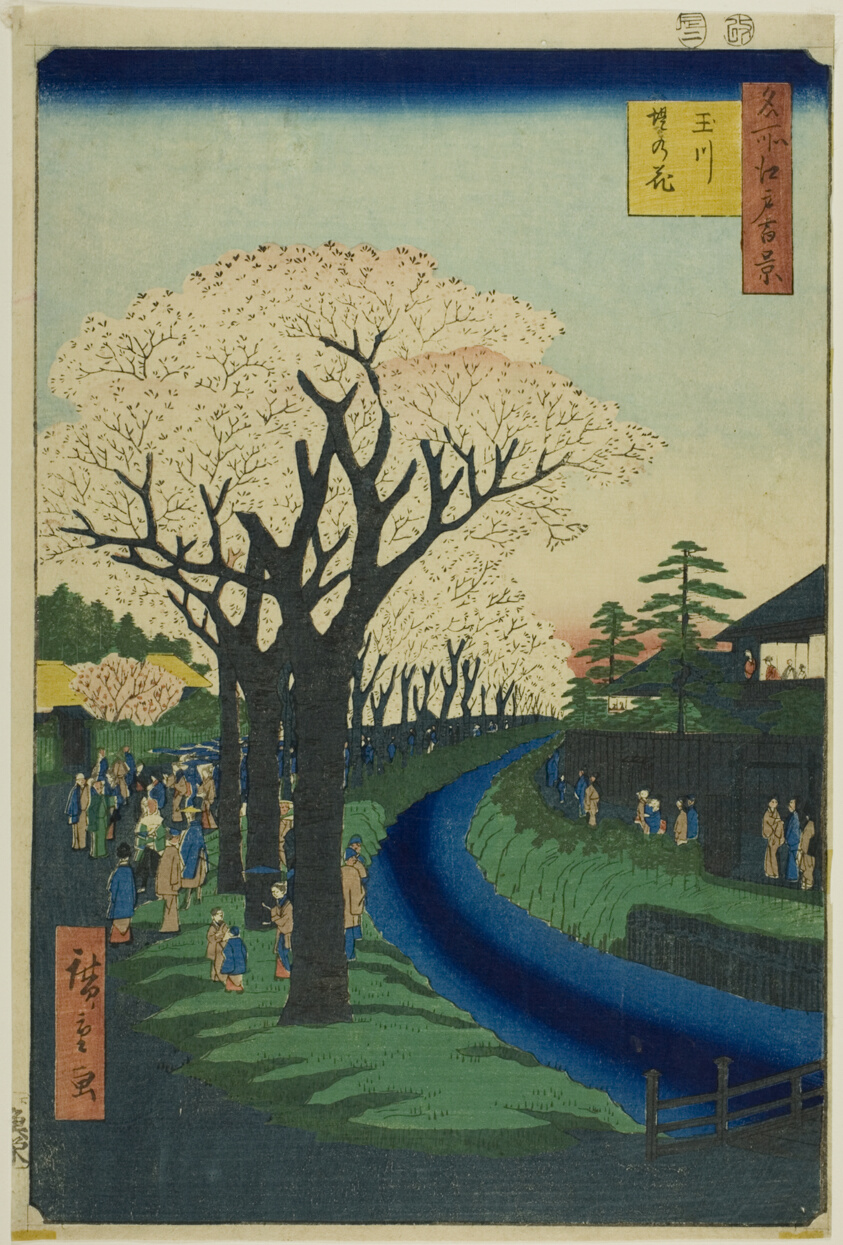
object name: Print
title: Blossoms on the Tama River Embankment (Tamagawa-zutsumi no hana), from the series "One Hundred Famous Views of Edo (Meisho Edo hyakkei)"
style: Japanese (culture or style)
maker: Utagawa Hiroshige 歌川 広重; Japanese, 1797–1858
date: 1856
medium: Color woodblock print; oban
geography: Japan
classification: woodblock print; print